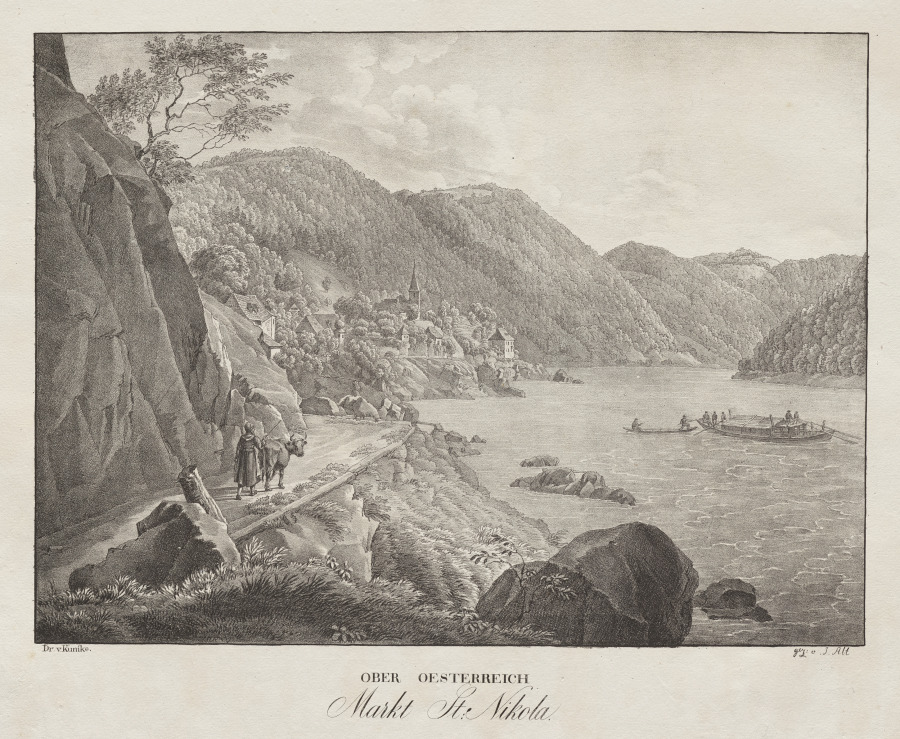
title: Nieder-oesterreich, Markt St. Nikola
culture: Austria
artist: Jakob Alt (Austrian, 1789–1872)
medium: lithograph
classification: Print